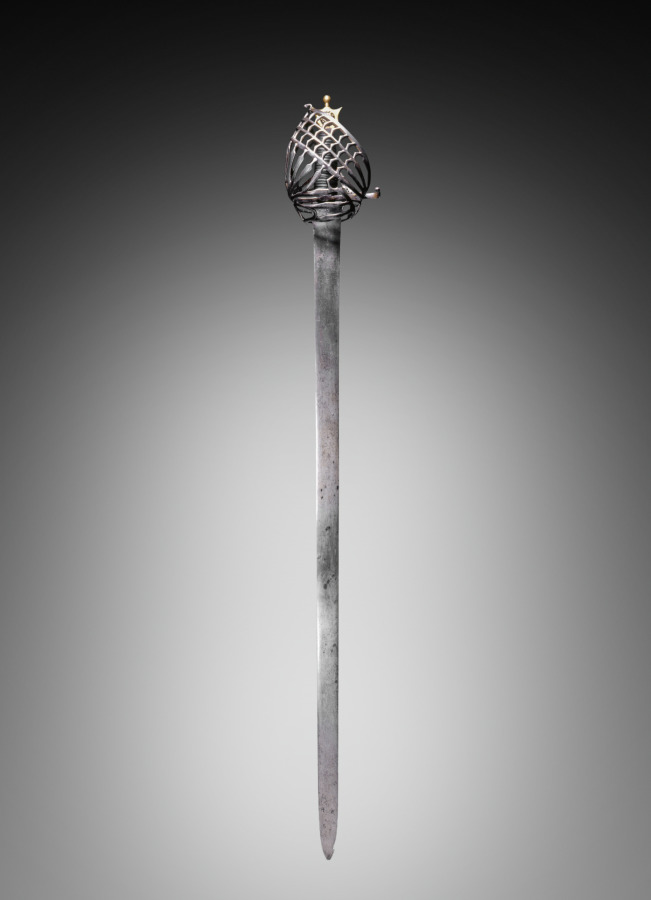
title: Schiavona Broadsword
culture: Italy, Venice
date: early 1700s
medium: steel, leather, wood, brass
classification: Arms and Armor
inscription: blade inscribed: POTZDAM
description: The schiavona-type broadsword features a complex barred guard that slopes forward. Its name derives from the Italian word for "Slavonic" and refers to the Slavonian corps who served as bodyguards to the Doge of Venice until the end of the Venetian Republic in 1797. Such swords were popular mainly with Venetians.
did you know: Usually used by the military, a broadsword has a straight, wide, two-edged blade a with basket-shaped guard that helps protect the hand.